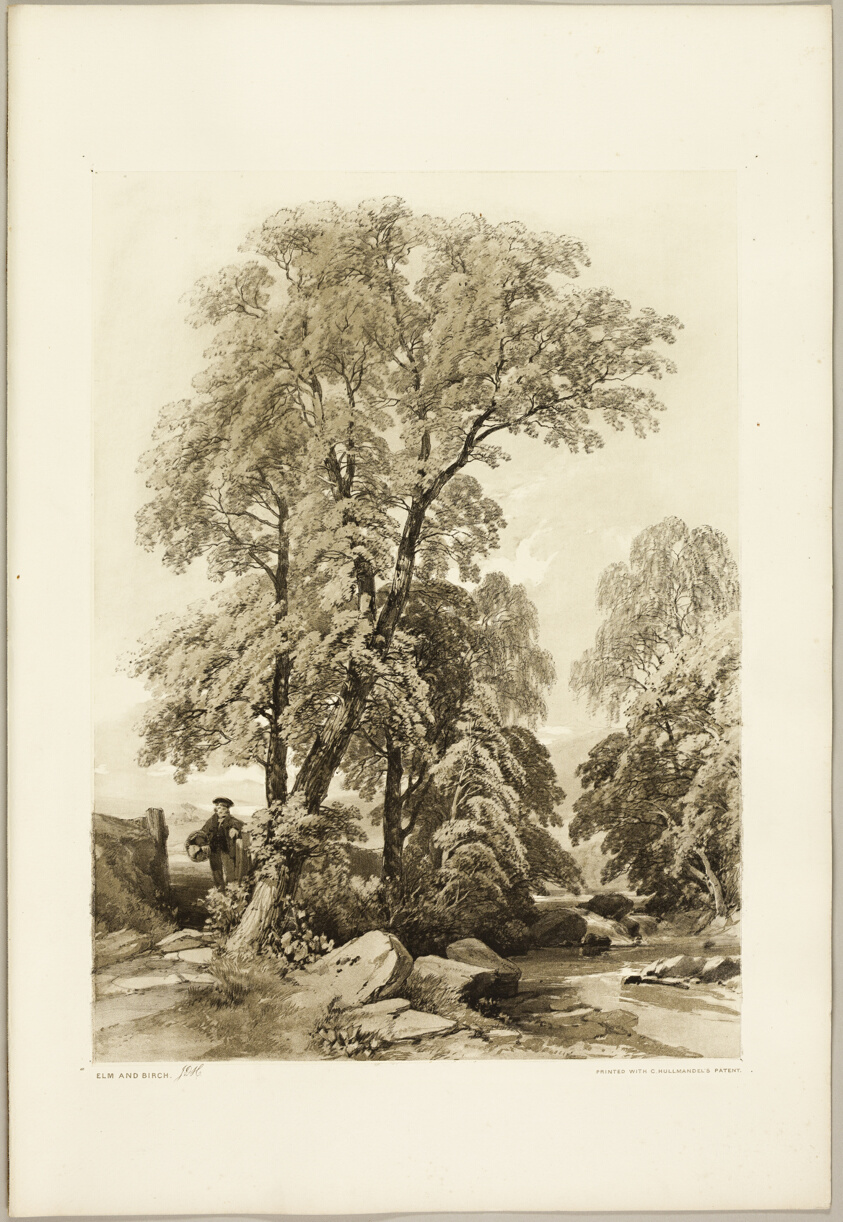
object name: Print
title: Elm and Birch, from The Park and the Forest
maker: James Duffield Harding (English, 1798-1863); printed by Charles Joseph Hullmandel (English, 1789–1850); published by Thomas McLean (English, 1788–1875)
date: 1841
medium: Lithograph in black, with brown tint from a second plate, on ivory wove paper, laid down on ivory wove paper (chine collé)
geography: England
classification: lithograph; print; prints and drawing